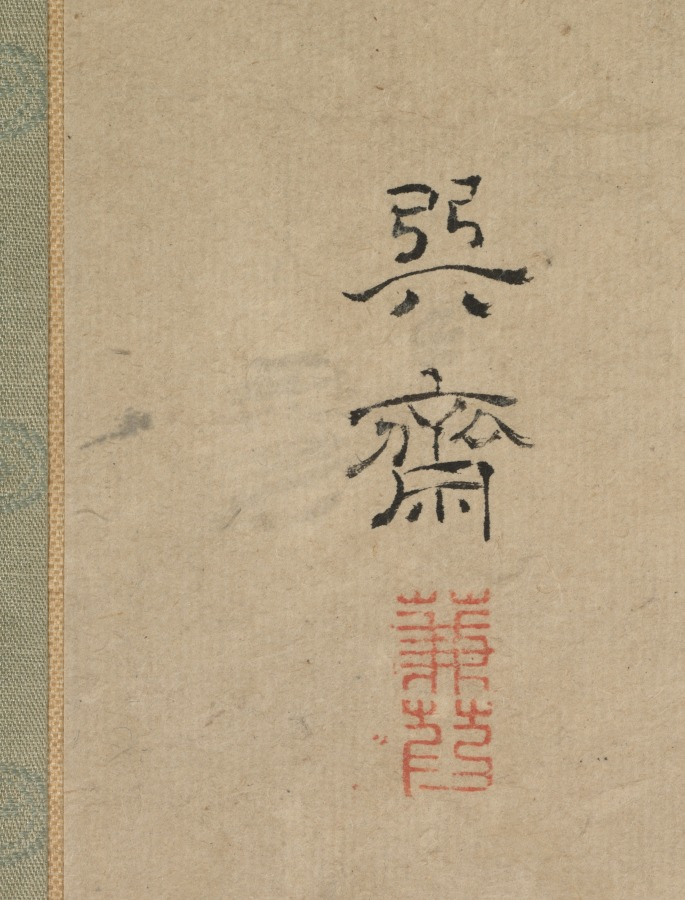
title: Landscape with Boaters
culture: Japan, Edo period (1615–1868)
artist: Kimura Kenkadō (Japanese, 1736–1802)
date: late 1700s–early 1800s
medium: hanging scroll; ink and slight color on paper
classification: Painting